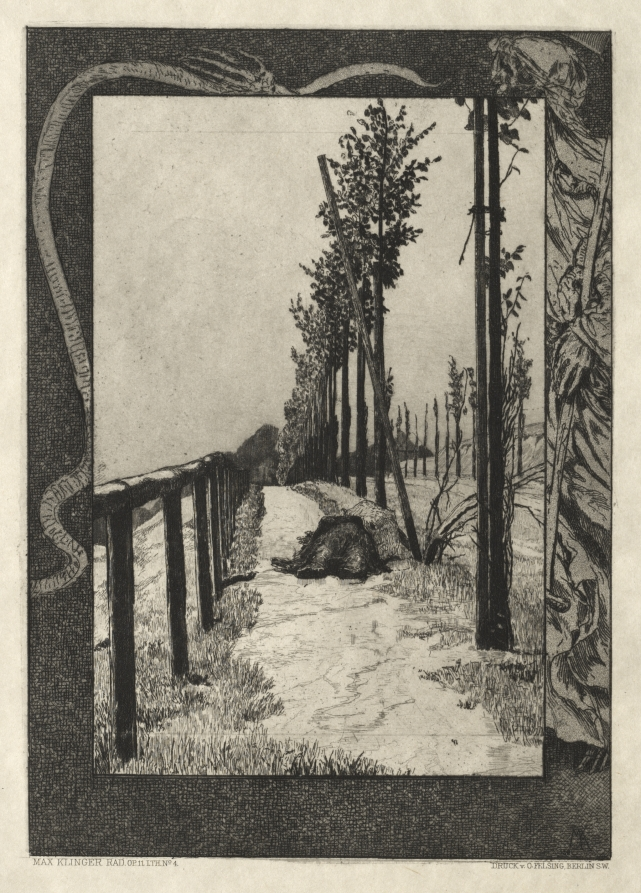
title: Vom Tode I, (Opus II, 1889) No. 4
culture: Germany, late 19th century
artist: Max Klinger (German, 1857–1920)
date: 1889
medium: etching and aquatint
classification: Print